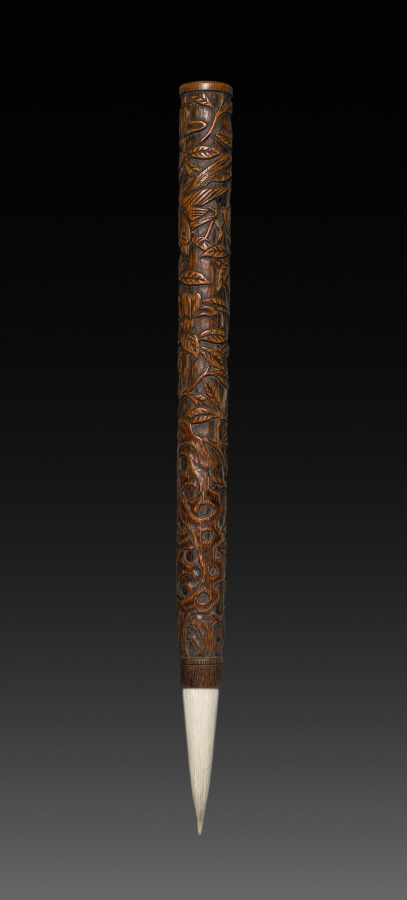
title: Brush with Carved Designs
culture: China, Ming dynasty (1368-1644), Wanli mark and reign (1573-1619)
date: 1573–1619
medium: carved bamboo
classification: Wood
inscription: 大明萬曆年製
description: In China, access to political power was granted to those who passed the civil service examinations, a system that offered official service only at a high level of education. Chinese literati-officials, whose daily routine involved administrative work in an office, enjoyed precious objects on their writing desks that offered distraction and demonstrated good taste. By the Ming (1368–1644) and Qing (1644–1911) dynasties, these utensils of the literati studio became also collectibles and were treasured as artworks. A brush, like this one, was essential for both administrative tasks and for artistic creation. The bamboo brush handle and cap were carved in shallow relief with branches, leaves, birds, and flowers. The brush tip was made from fine white animal hairs.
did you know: The inscription on this brush with a bamboo cap reads: Made during the Wanli Era of the Great Ming [dynasty].